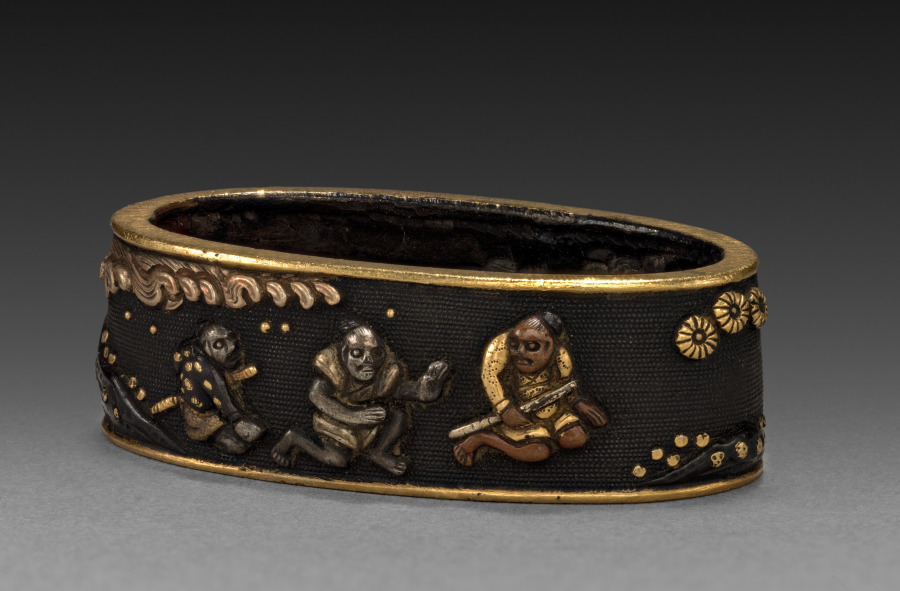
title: Sword-Hilt Collar (Fuchi)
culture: Japan, Edo period (1615–1868)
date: 1700–1850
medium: shakudo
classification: Arms and Armor